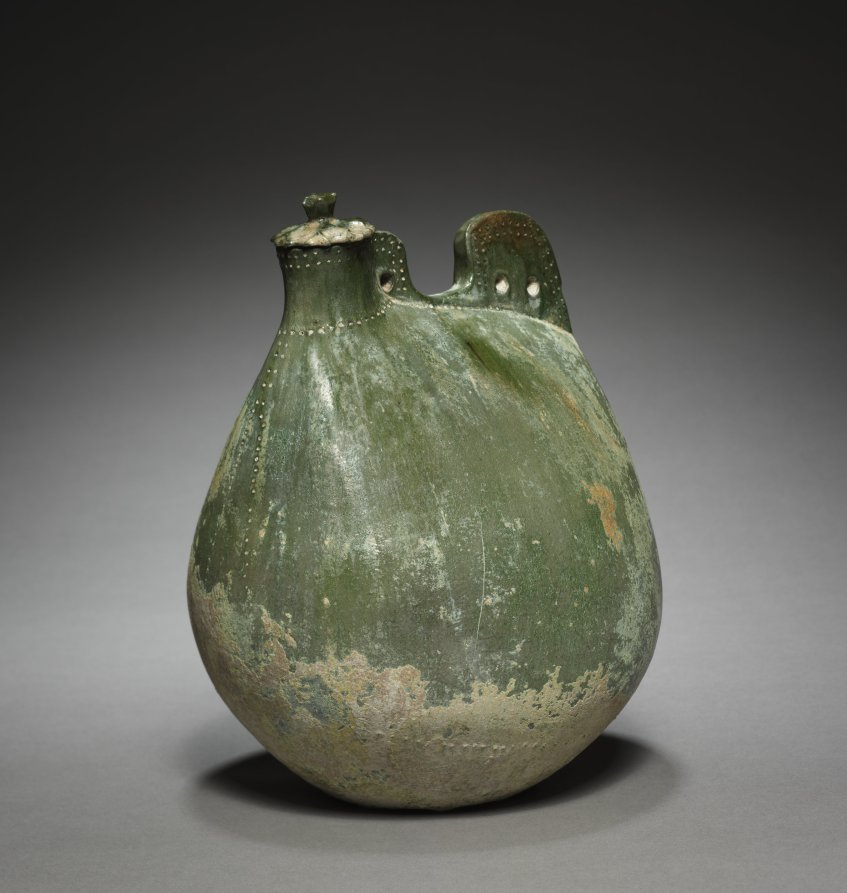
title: Leather Bag-Shaped Flask with Cover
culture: Northeast China, Liao dynasty (916-1125)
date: 916–1125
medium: earthenware with green glaze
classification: Ceramic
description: Flasks like these derive their shapes from leather bags; even the edges are finely rouletted to resemble the seams of sewn leather. These were used by the nomadic Khitan people who established the Liao kingdom in Inner Mongolia, Manchuria, and North China. Such wares represented the Liao adoption of the Tang Chinese ceramic tradition, and yet they expressed ethnic identity and new innovations resulted from the cultural borrowing.